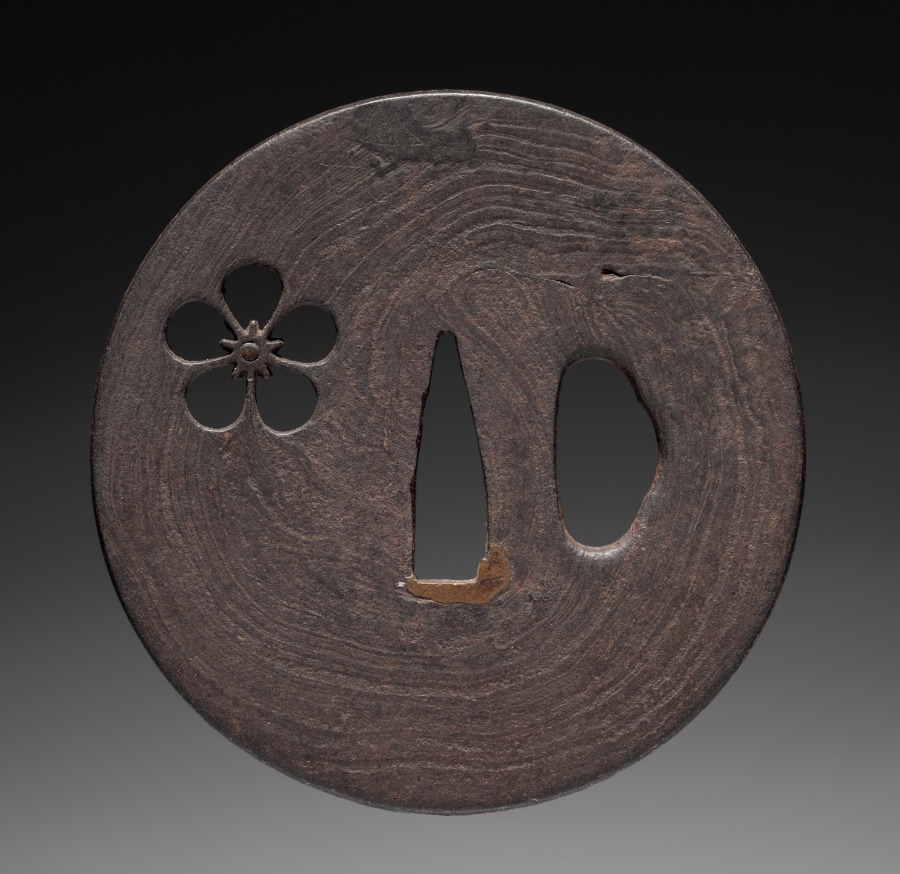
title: Sword Guard (Tsuba) with Plum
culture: Japan, possibly Edo period (1615-1868)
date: c. 1615–1868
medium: iron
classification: Arms and Armor